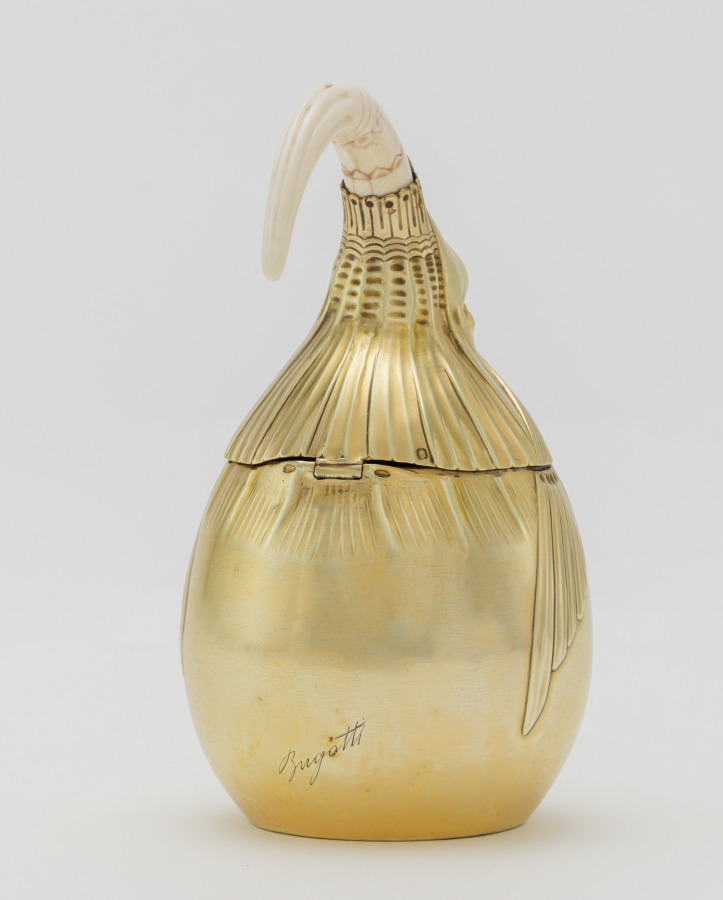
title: Covered Sugar Bowl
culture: France, Paris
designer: Carlo Bugatti (Italian, 1856–1940)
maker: Adrien-Aurélien Hebrard (French, 1866–1937)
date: c. 1907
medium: Gilt silver and ivory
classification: Silver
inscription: Made by A. A. Hebrard Firm, Paris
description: This tea and coffee service, salver, and table, together with some now missing cups, were all designed by Carlo Bugatti as an ensemble and presented at the 1902 exposition devoted to decorative arts in Turin, Italy. The set was probably acquired from Bugatti's 1907 exhibition at the Galerie Hébrard in Paris by a wealthy South African widow, Anna Blake, who was living there at the time. Some of the animal and insect motifs suggest mythical beasts or the fossils of prehistoric animals. When Mrs. Blake returned to Cape Town, she took these and other pieces designed by Bugatti with her, and they remained in South Africa throughout her lifetime.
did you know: This covered sugar bowl is part of a larger tea and coffee service designed by Carlo Bugatti.